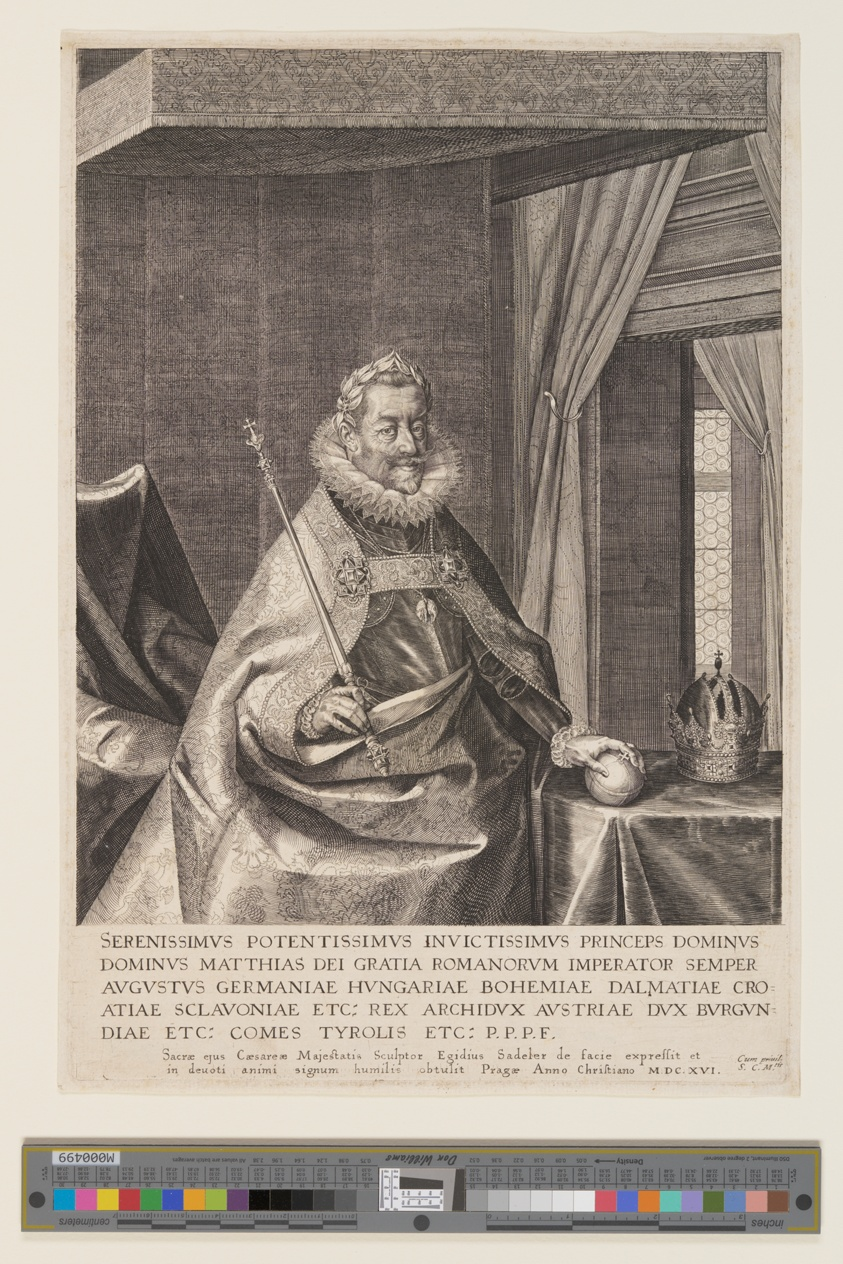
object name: Print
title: Emperor Matthias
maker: Aegidius Sadeler II; Flemish, c. 1570–1629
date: 1616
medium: Engraving on ivory laid paper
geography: Flanders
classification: print; paper; prints and drawing; engraving